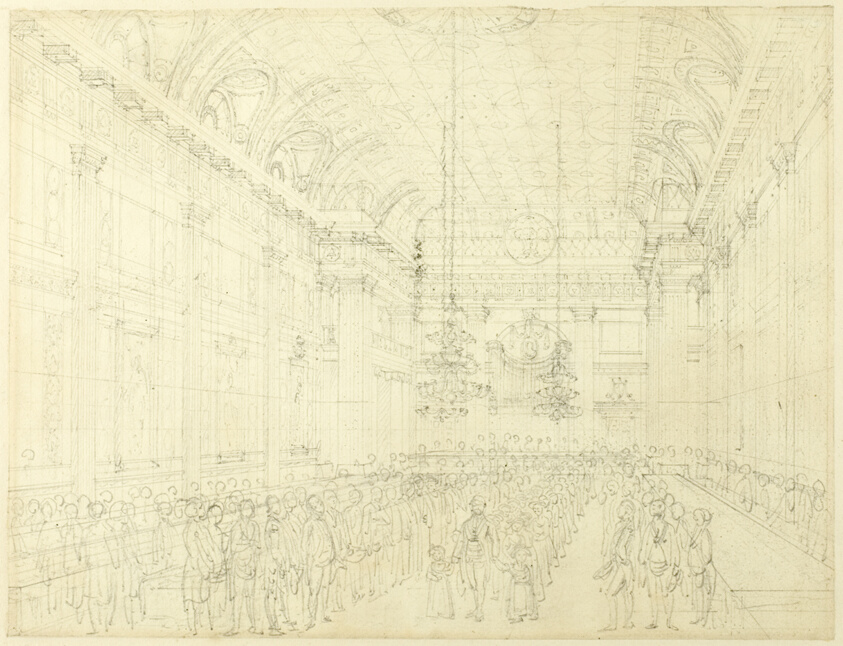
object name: Drawing and Watercolor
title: Study for Freemason's Hall, Great Queen Street, from Microcosm of London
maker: Augustus Charles Pugin (English, born France, 1762-1832); Thomas Rowlandson (English, 1756-1827)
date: c. 1808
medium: Graphite on cream wove paper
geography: England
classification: graphite; drawings (visual works); prints and drawing